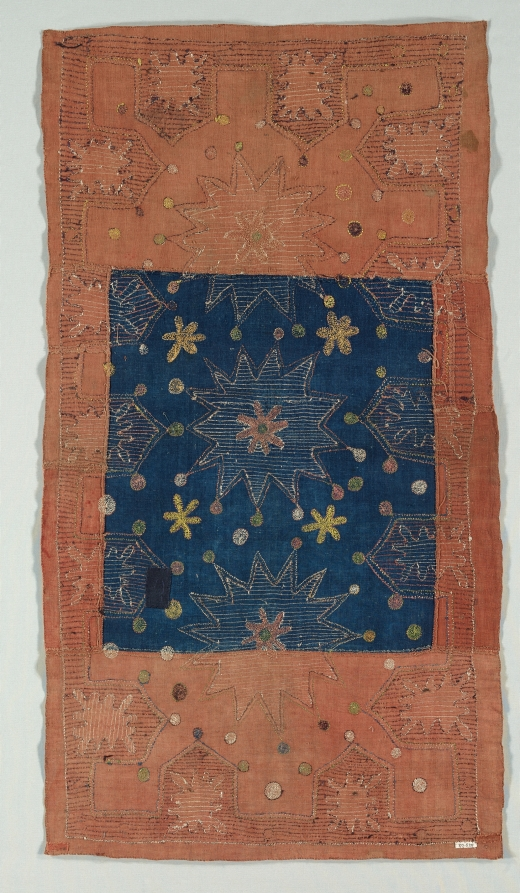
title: Cushion Cover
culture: Dagestan, 18th century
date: 1700s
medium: embroidery, silk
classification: Embroidery